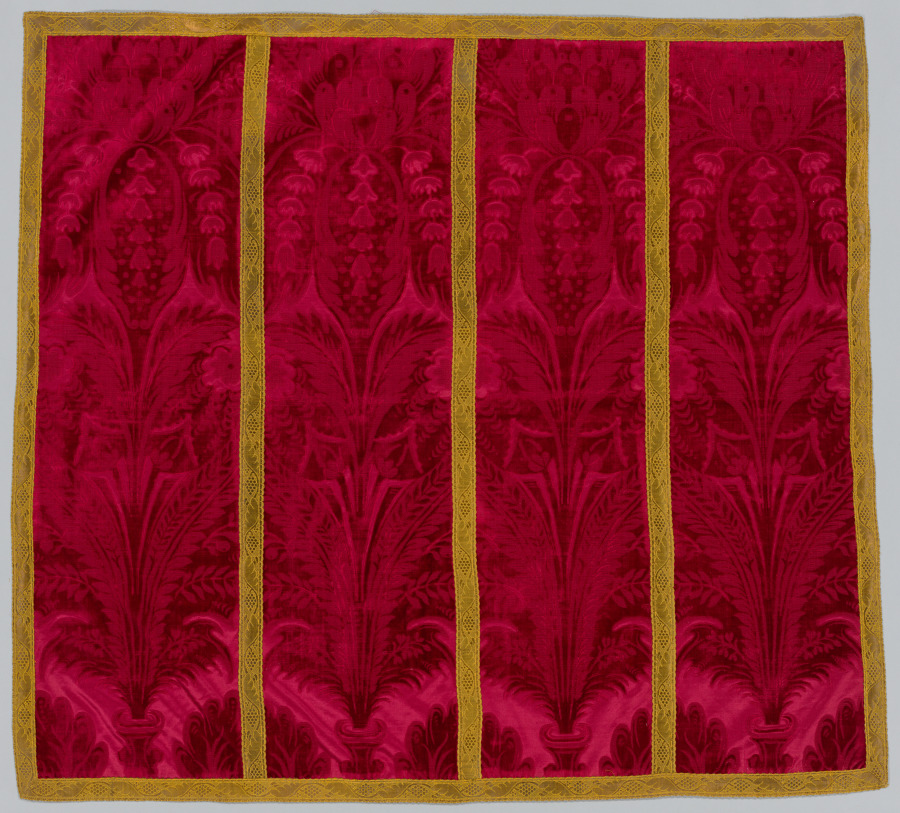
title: Altar Hanging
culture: Italy, 17th century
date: 1600s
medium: velvet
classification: Velvet